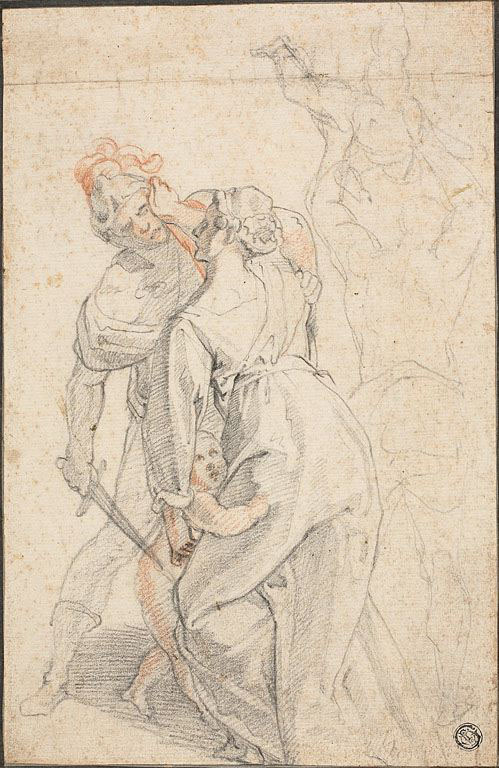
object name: Drawing and Watercolor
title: Figures from a Massacre of the Innocents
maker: Andrea Boscoli (Italian, c. 1560-1608)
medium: Black and red chalk on cream laid paper, laid down on cream wove card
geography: Italy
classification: chalk; drawings (visual works); prints and drawing